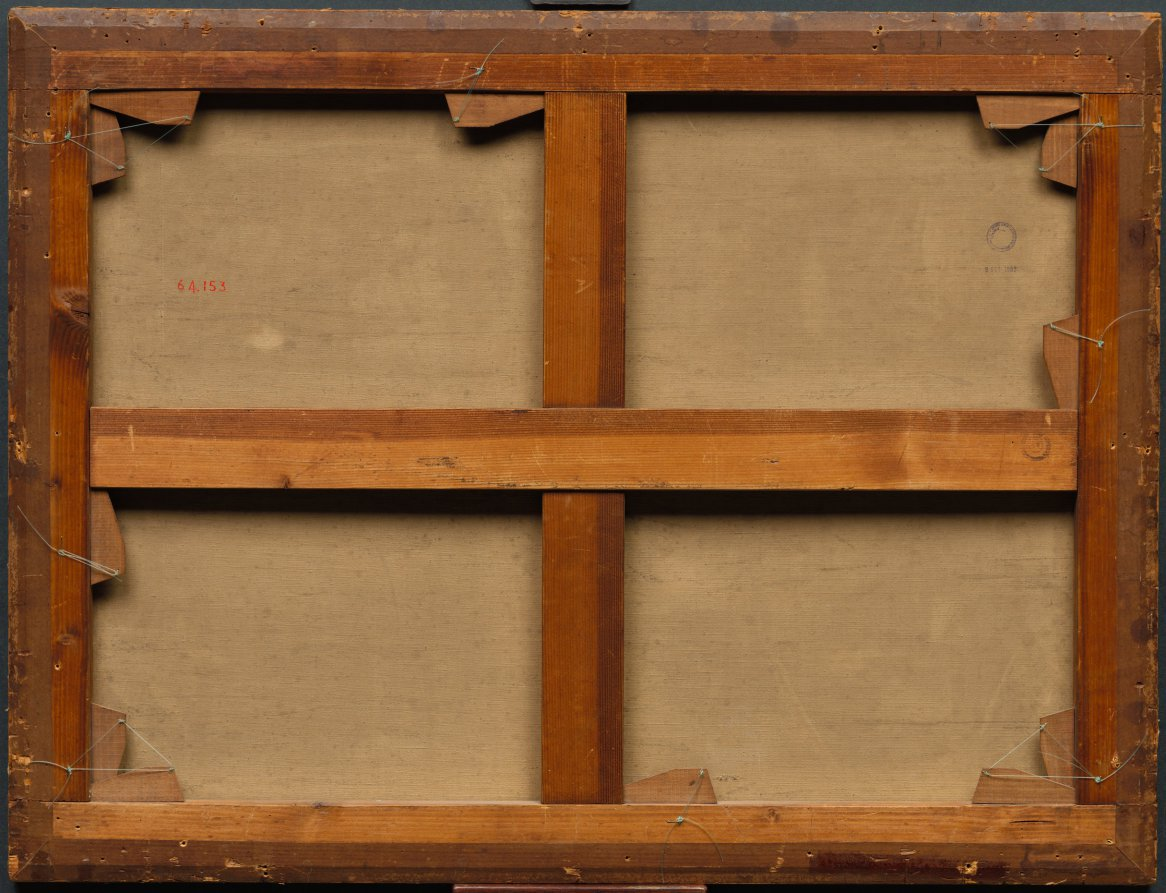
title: Esther, Ahasuerus, and Haman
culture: Netherlands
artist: Jan Steen (Dutch, 1626–1679)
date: c. 1668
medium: oil on canvas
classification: Painting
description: Esther, the wife of the Persian king Ahasuerus, effectively concealed her Jewish identity until the prime minister Haman hatched a plot to annihilate the kingdom’s Jews. To save her people Esther persuades the king (at the center) to rescind his order. He then turns against Haman, who slumps in his seat, aware of his sudden fall from power and his bleak future.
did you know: At the center of this biblical scene, Steen included elements of a typical Dutch still life: a Roemer glass, a half-peeled lemon, and a blue-and-white porcelain dish.